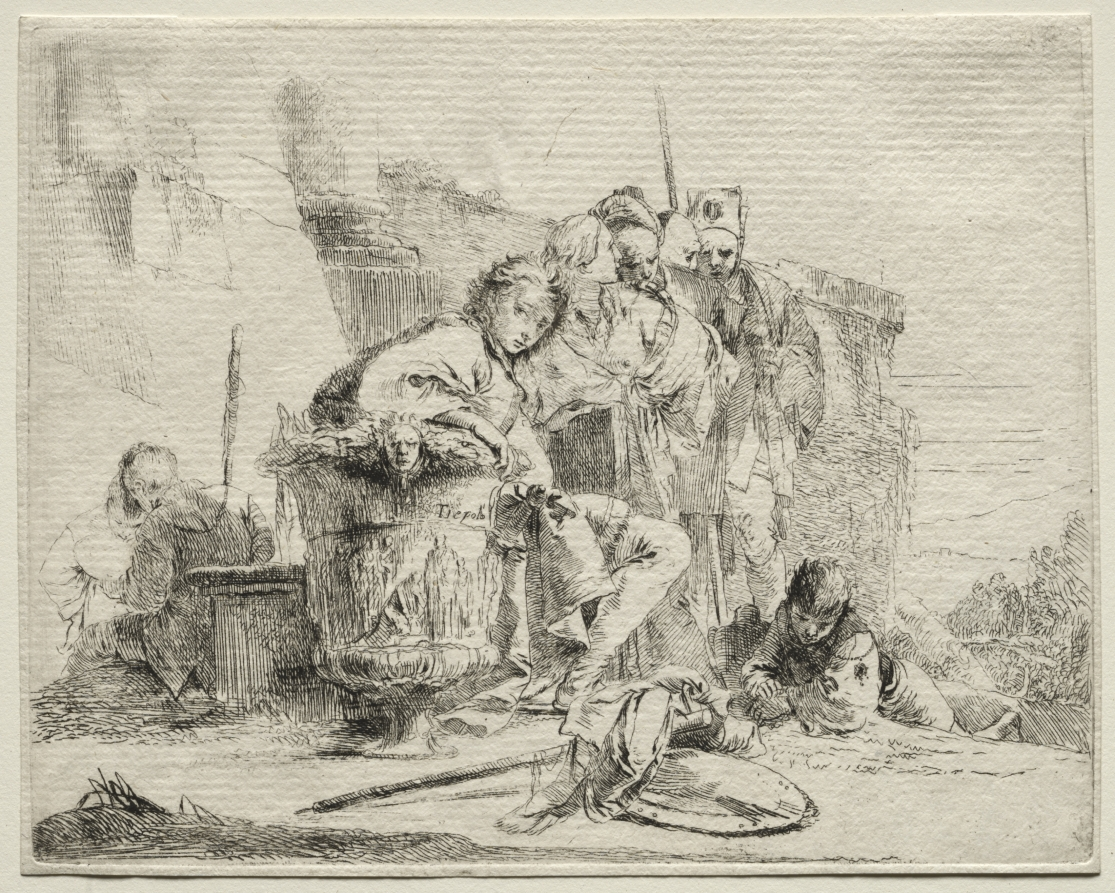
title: Various Caprices: Young Man Seated, Leaning Against an Urn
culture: Italy, 18th century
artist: Giovanni Battista Tiepolo (Italian, 1696–1770)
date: 1735–50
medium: etching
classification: Print